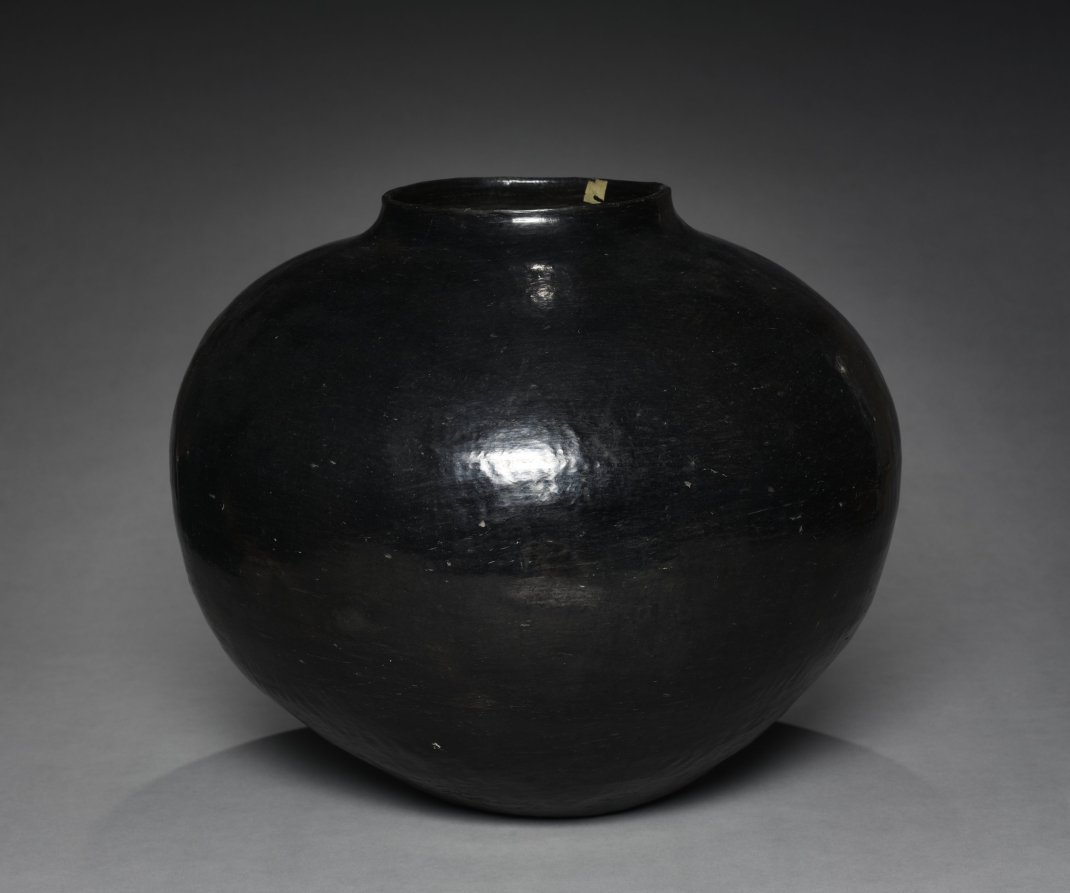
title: Storage Jar, Half- Fanega Size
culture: Southwest, Pueblo, Santa Clara, Post- Contact Period, 19th century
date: 1880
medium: reduction-fired (blackware)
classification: Ceramic